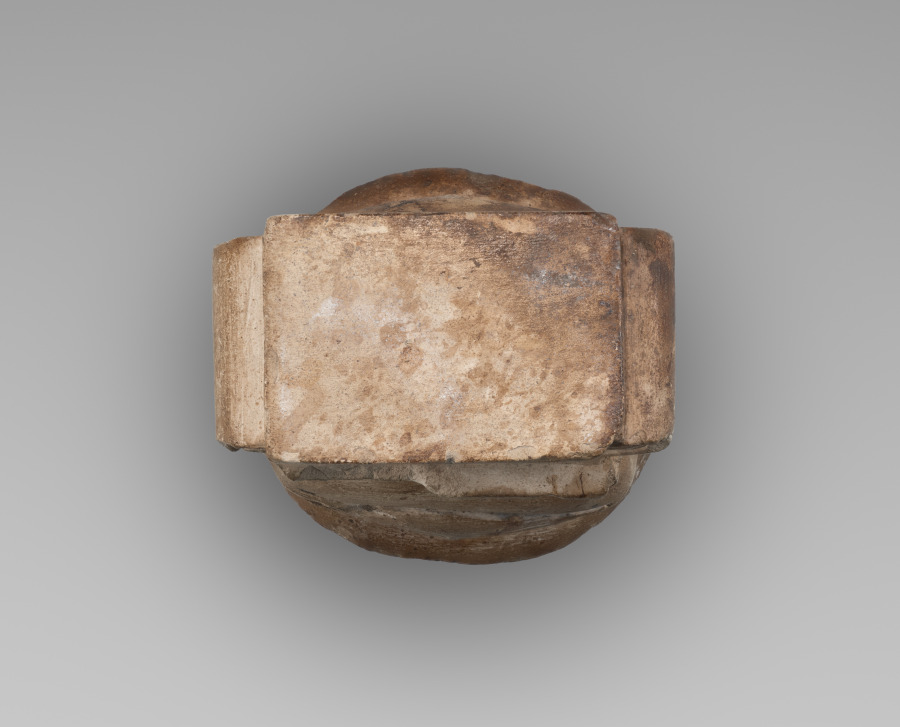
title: Votive Hathor Column Capital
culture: Egypt, Late period (715–332 BCE), Dynasty 30–Greco-Roman period (332 BCE–395 CE), Ptolemaic dynasty (305–30 BCE)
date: 380–30 BCE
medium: limestone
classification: Sculpture